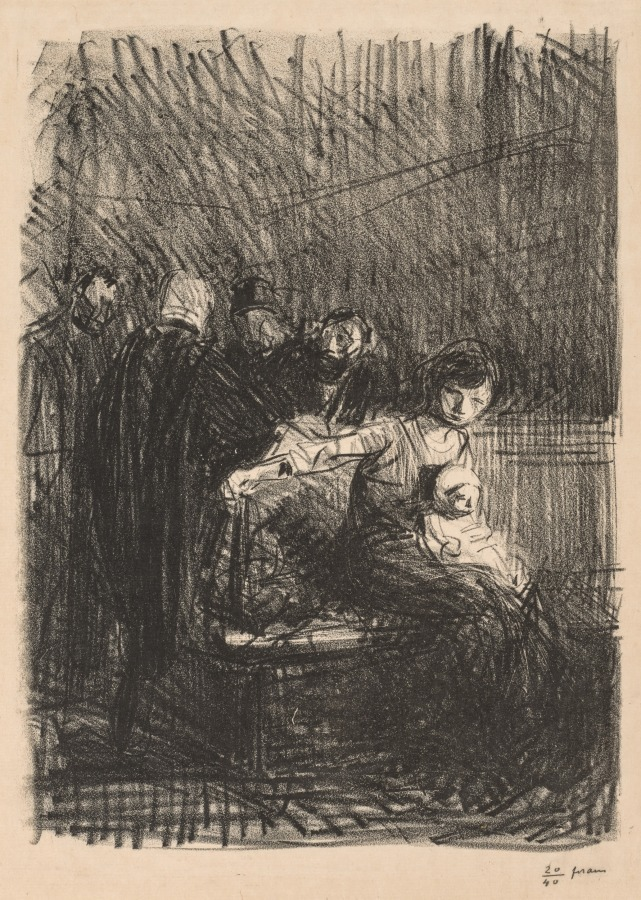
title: Court Recess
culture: France, 19th-20th century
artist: Jean Louis Forain (French, 1852–1931)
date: c. early 1900s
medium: lithograph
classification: Print